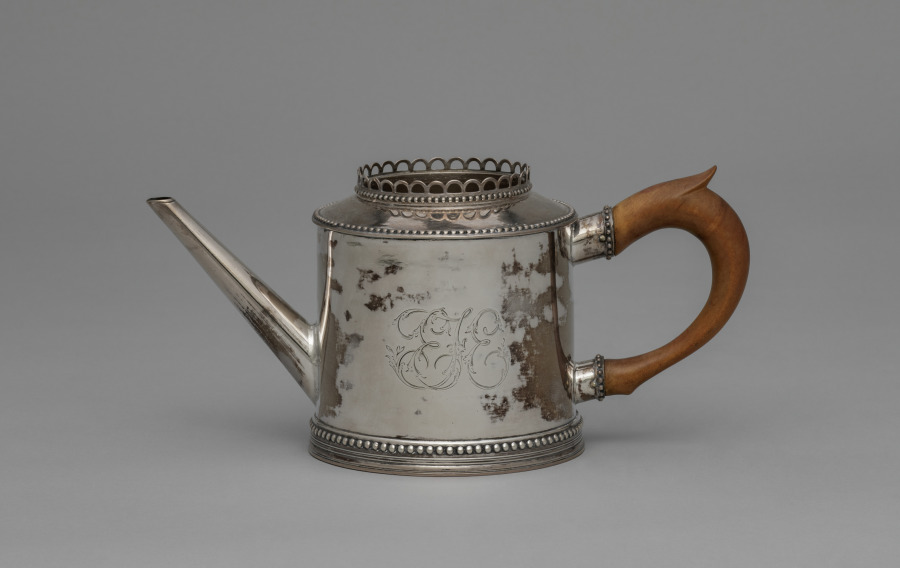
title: Teapot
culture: America, Pennsylvania, Philadelphia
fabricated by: John David (American, 1736–1793)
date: c. 1790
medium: silver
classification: Silver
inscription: engraved: "EFE" in script .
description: This teapot may have belonged to Dr. Enoch F. Edwards, George Washington’s personal physician.